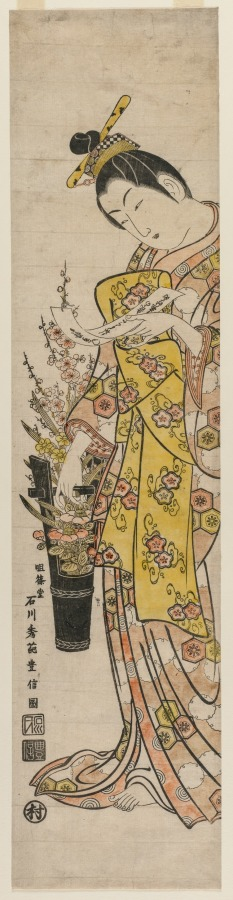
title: Courtesan Reading a Poem Slip Tied to Flowers in a Vase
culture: Japan, Edo period (1615–1868)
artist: Ishikawa Toyonobu (Japanese, 1711–1785)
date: mid-1740s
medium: color woodblock print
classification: Print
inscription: Signature: Tanjodo Ishikawa Shuen Toyonobu zu. Artist Seal: Ishikawa Toyonobu. Publisher: Murataya Jirobei (Mura).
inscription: Collector's seal: Vever